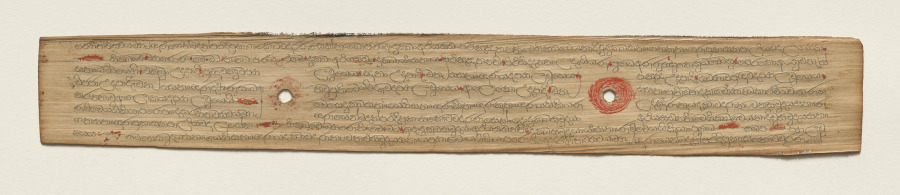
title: Leaf from a Buddhist Manuscript (verso)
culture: Sri Lanka, Singhalese, Late 17th century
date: c. 1700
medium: fiber paper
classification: Manuscript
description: Palm leaf material is still used for manuscripts in Sri Lanka. The palm leaves are prepared first by boiling them, drying them in the sun, and then rubbing them with oils. Scribes then use a metal stylus to incise the text. Then charcoal powder is wiped across the pages, filling in only the inscribed lines.